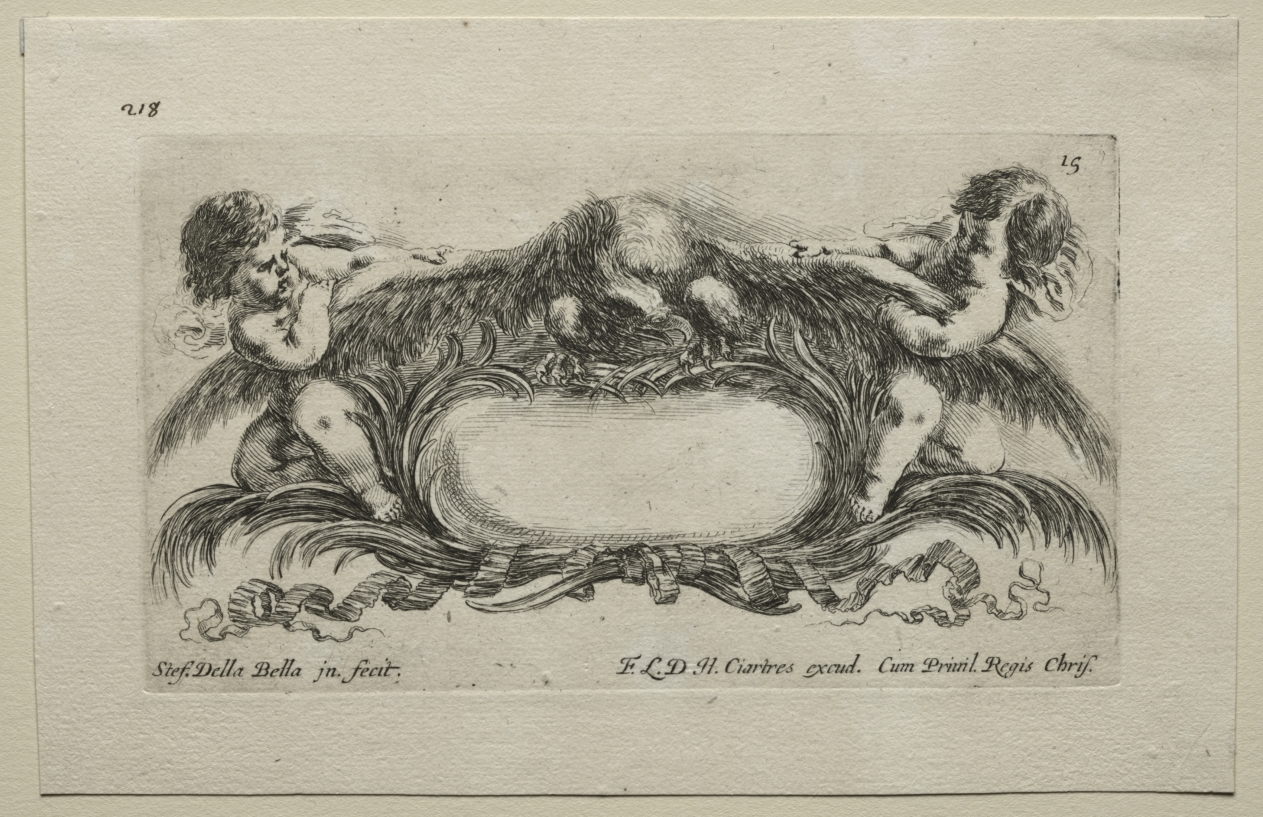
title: Collection of Various Caprices and New Designs of Cartouches and Ornaments: No 15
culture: Italy, 17th century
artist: Stefano Della Bella (Italian, 1610–1664)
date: c. 1642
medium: etching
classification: Print